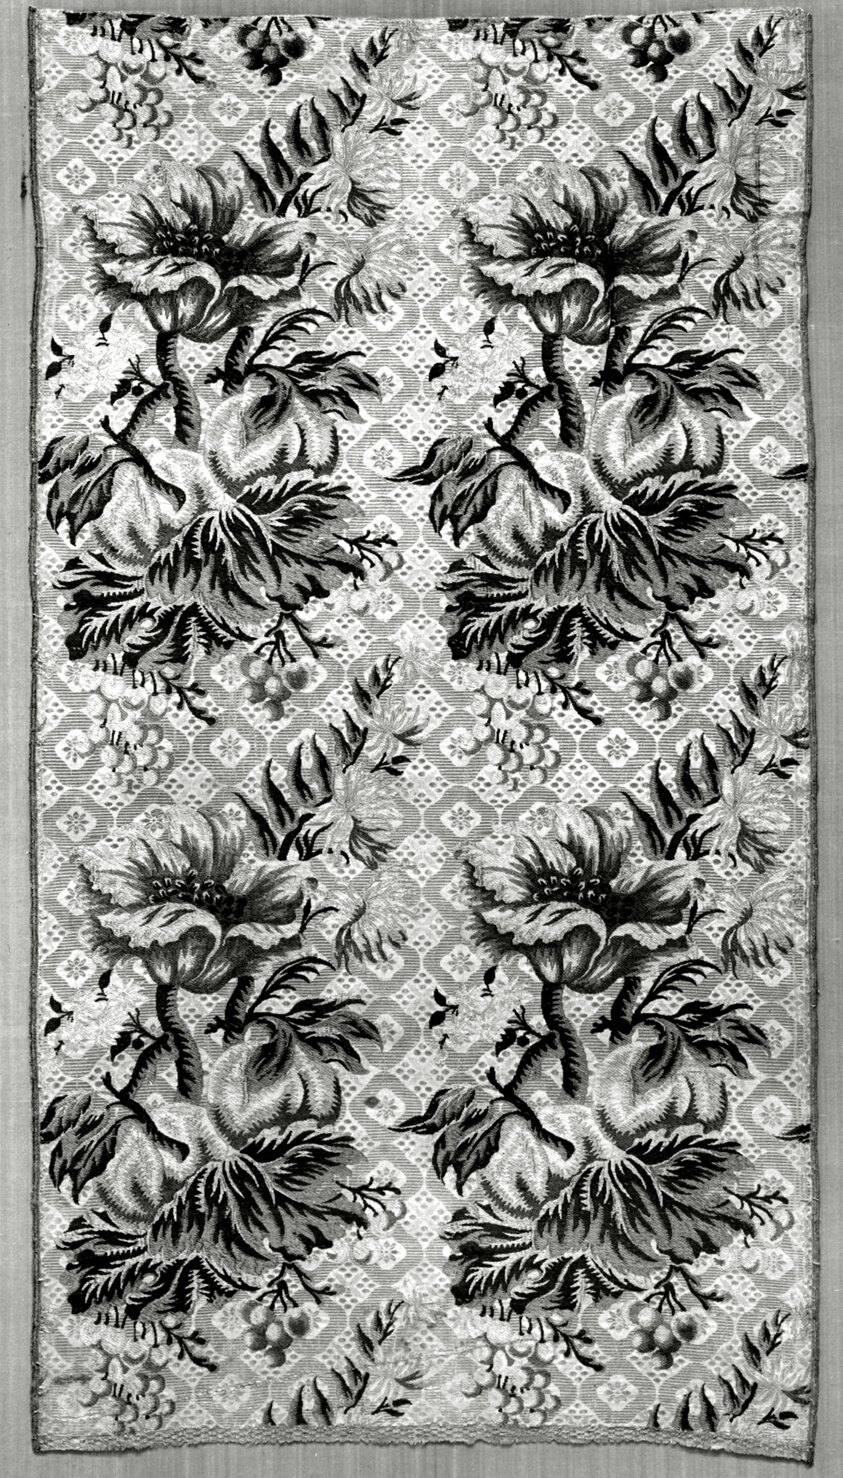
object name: Textile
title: Panel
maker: Possibly from a design by Jean Revel (French, 1664–1751); France, Lyon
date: 1730/35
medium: Silk, plain weave with supplementary patterning warps and supplementary brocading wefts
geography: France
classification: textile; weaving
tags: flowers, foliage, fruit